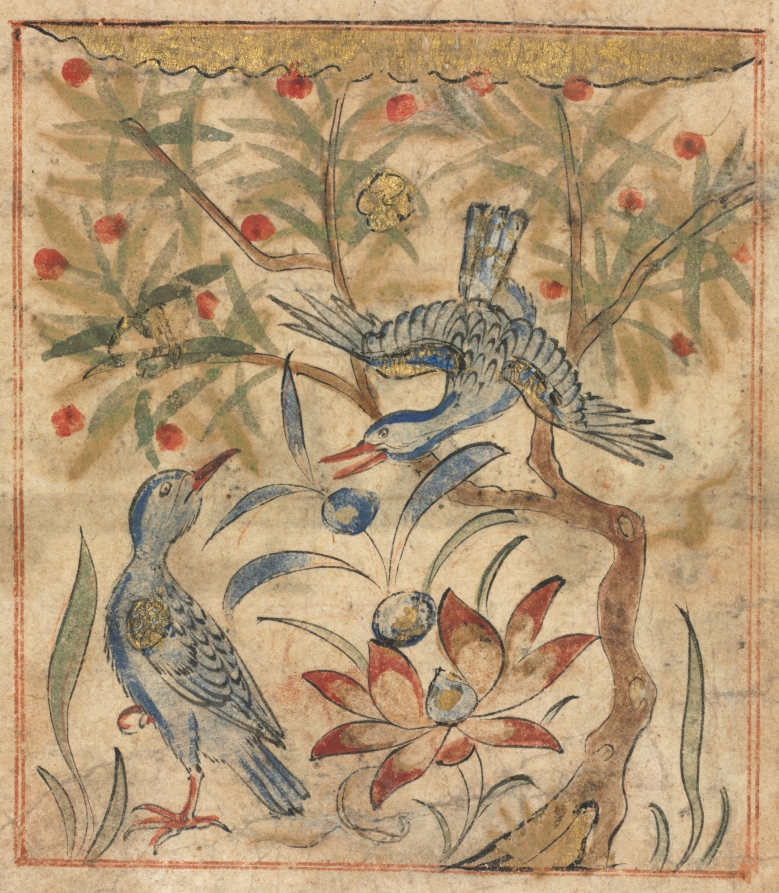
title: Folio from a Persian Manafi‘ al-Hayawan (The Benefits of Animals) of Abu Said Ubaid-Allah ibn Jibrail ibn Bakhtishu (died 1058–68) (recto)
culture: Iran, Maragah, Ilkhanid period (1256–1353)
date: c. 1300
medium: opaque watercolor, ink, and gold on paper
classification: Manuscript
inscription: script: Naskh (text), Kufi (heading)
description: This small illustration of ringdoves incorporates the influence of Chinese naturalism in the drawing of the tree trunk and lotus blossom. In contrast, the reverse side is more traditional. The innovative page layouts feature cursive nashki script with bold angular kufic script headings. Derived from Aristotelian sources, this treatise deals with the physical characteristics and organs of animals. The text was translated into Persian from Arabic for the Ilkhanid ruler Ghazan Khan (reigned 1295–1304). Roughly a dozen pages from this long-lost manuscript are known. It is dated by comparison with a similar manuscript made at Maragha, near Tabriz, in 1297 or 1299.